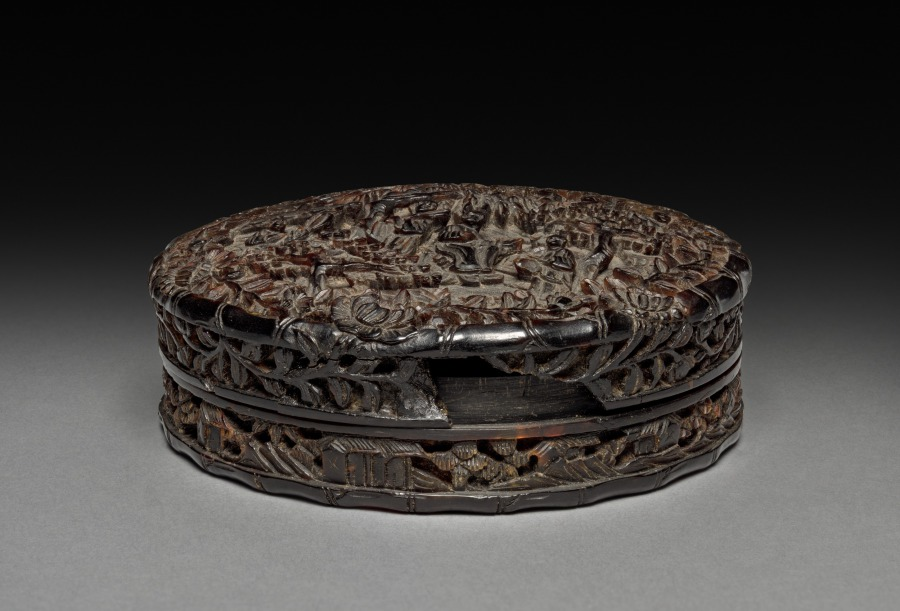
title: Fragrance Box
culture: China, Qing dynasty (1644-1911)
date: 1700s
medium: tortoiseshell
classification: Miscellaneous